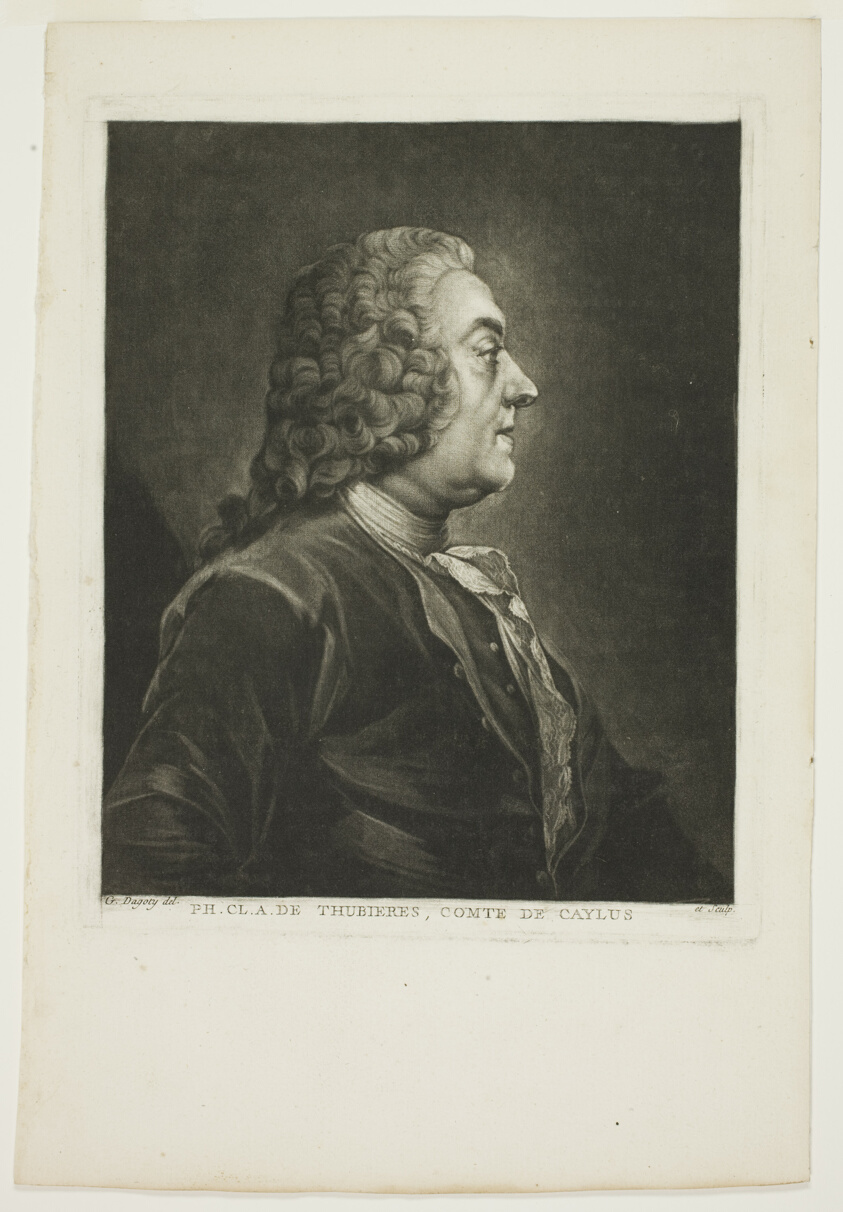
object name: Print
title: Philippe Claude Tubières, Comte de Caylus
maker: Jean Baptiste André Gautier d'Agoty (French, 1740-1786)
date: 1770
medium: Mezzotint on ivory laid paper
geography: France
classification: mezzotint; print; prints and drawing